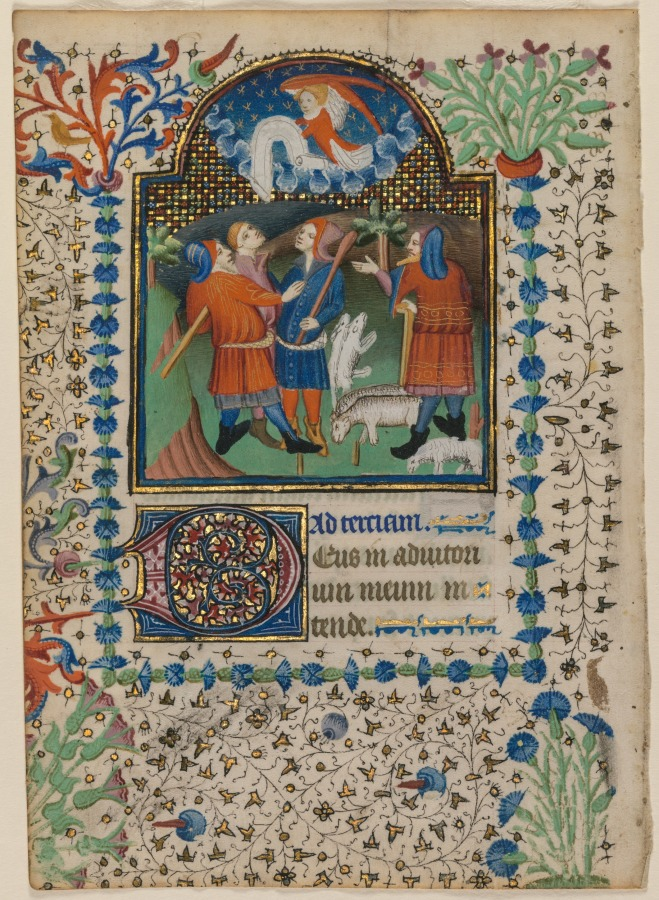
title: Leaf from a Book of Hours: Annunciation to the Shepherds (recto) and Text (verso)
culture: France, Paris (?), 15th century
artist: Boethius Illuminator (Flemish, active c. 1414–20)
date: c. 1410–20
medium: ink, tempera and gold on vellum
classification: Manuscript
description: This finely preserved leaf with its large miniature is stylistically consistent with the work of the Boethius Illuminator. An unusual and very original painter, he was named after a manuscript copy of the works of the Roman philosopher Boethius (AD 480-524), which he illuminated in 1414. The artist favored bright, sweeping colors and expressionistic compositions. He used tessellated (mosaic-patterned) grounds in his miniatures, as is the case here. The Boethius Illuminator and his assistants participated in the illustration of over a dozen manuscripts between 1414 and 1418/20. It was not unusual for artists working in different styles to collaborate on a single book of hours during the 1400s and 1500s.